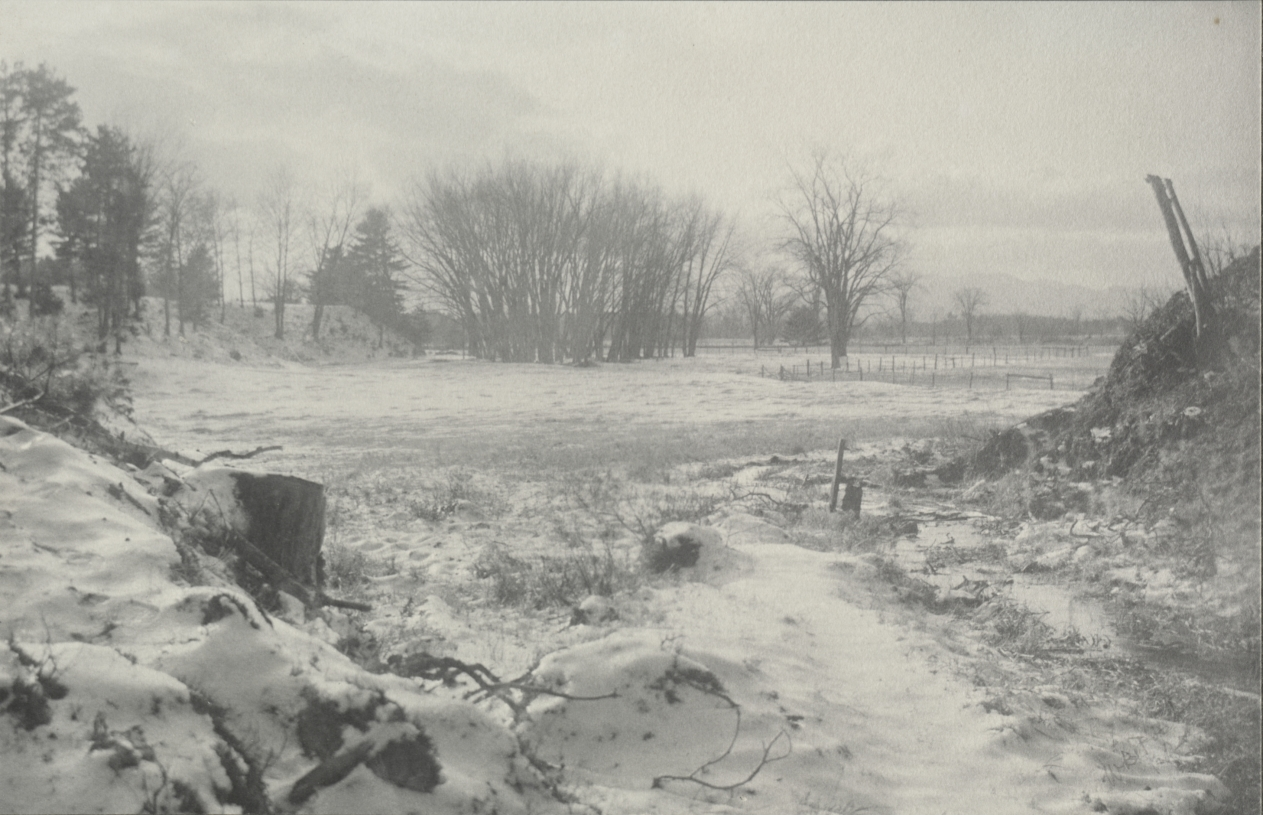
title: Untitled (Winter Landscape)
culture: America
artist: William B. Post (American, 1857–1925)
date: c. 1900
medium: platinum print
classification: Photograph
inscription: Written in pencil on verso: "L82:2415:38"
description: In the decades around the turn of the 20th century, Post frequently exhibited his Pictorial photographs in the United States, Canada, and Europe. This well-regarded amateur photographer was especially known for his winter scenes, often taken in the vicinity of his home in Fryeburg, Maine. Cleverly positioned, the photographer used two mounds of earth in the foreground to frame a complex landscape of open fields populated by stands of trees and a weaving line of fences leading the eye to the distant mountain range. Post hoped his ability to compose and his mastery of powerful visual effects would earn him recognition as a master of landscape photography.